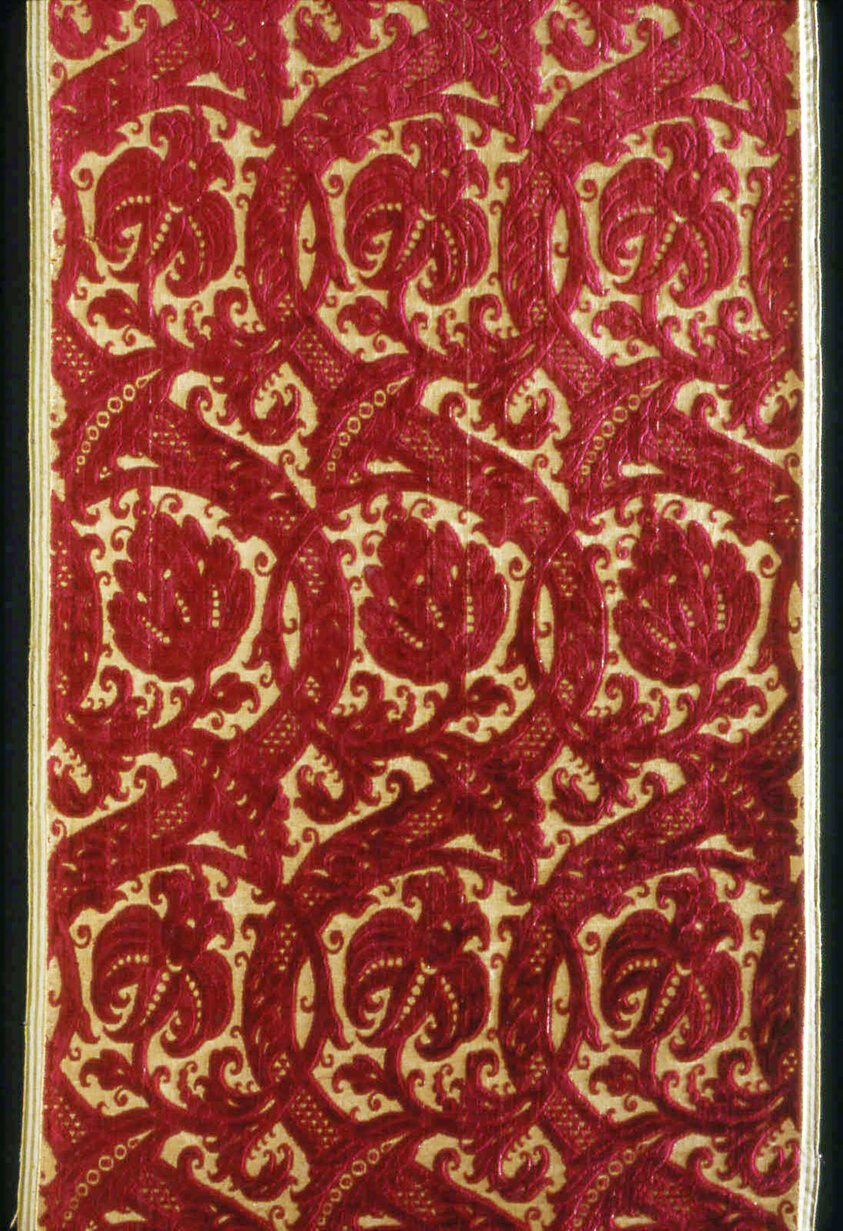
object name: Textile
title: Panel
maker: Italy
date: 1675/1700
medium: Silk and gold gilt strip, warp-float faced twill weave with supplementary patterning wefts tied by supplementary binding warps and supplementary pile warps forming cut, uncut, and voided velvet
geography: Italy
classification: textile; weaving; weaving - velvet